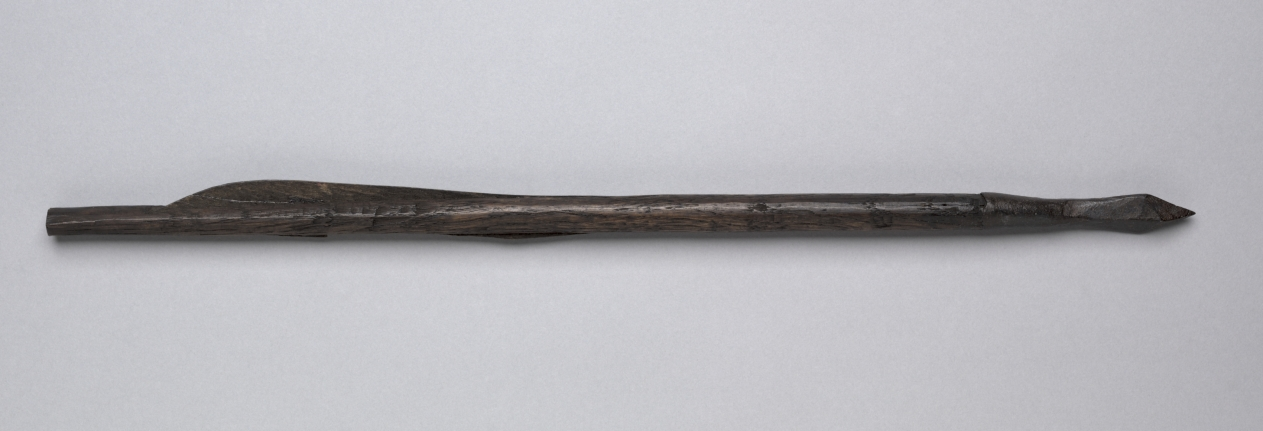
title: Crossbow Bolt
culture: Germany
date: 1500s-1600s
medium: wood, leather, steel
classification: Arms and Armor